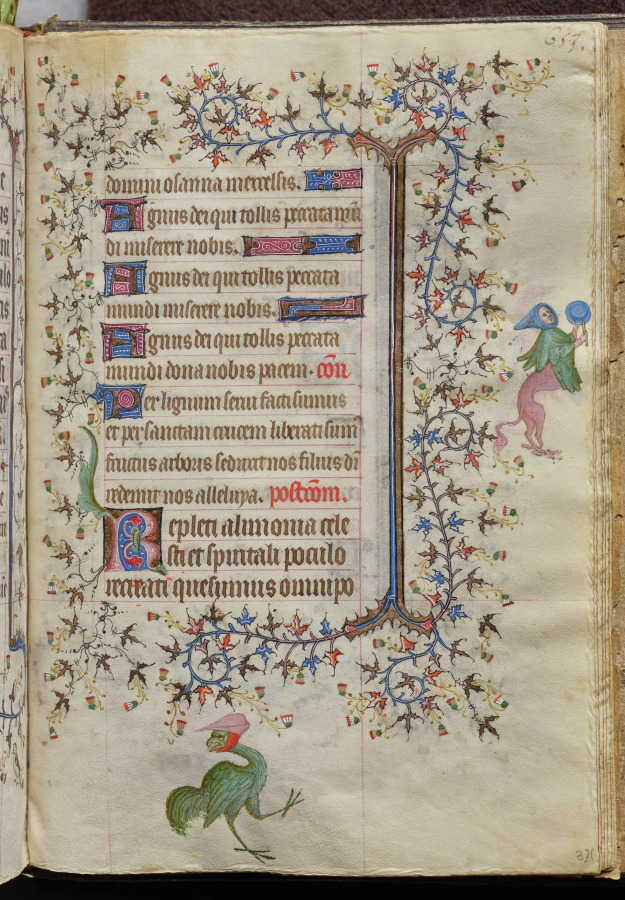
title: Hours of Charles the Noble, King of Navarre (1361-1425), fol. 321r, Text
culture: France, Paris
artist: Master of the Brussels Initials and Associates (French)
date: c. 1405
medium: ink, tempera, and gold on vellum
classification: Bound Volume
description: This precious volume was obviously highly prized by its owner, the French-born King of Navarre, who had his coat of arms painted on no less than twenty folios. Rather than directly commissioning this manuscript from a specific workshop, it seems that Charles the Noble acquired his book of hours -- perhaps ready-made for the luxury market -- while on a trip to Paris in 1404-05. A collaborative effort, six painting styles are evidenced within the pages of this codex, those of two Italians, two Frenchmen, and two Netherlanders. The painter who was responsible for the planning and decoration of the book, and who produced seventeen of the large miniatures, was a Bolognese artist known as the Master of the Brussels Initials. His principal assistant, responsible for most of the borders, was a Florentine who signed his name "Zecho" da Firenze on folio 208 verso.